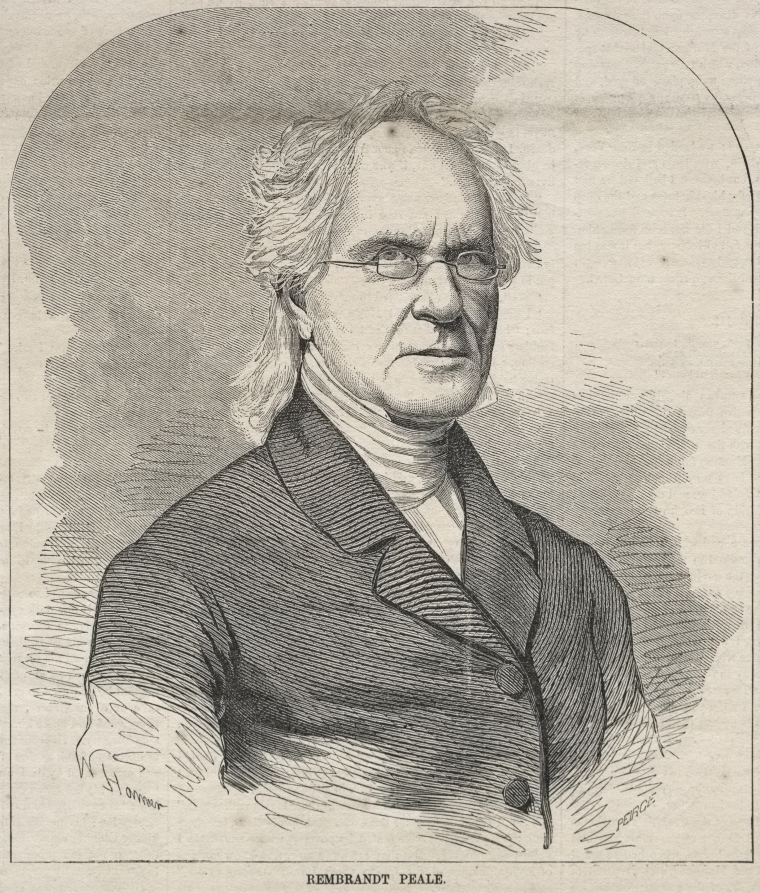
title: Rembrandt Peale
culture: America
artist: Winslow Homer (American, 1836–1910)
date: 1857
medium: wood engraving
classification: Print